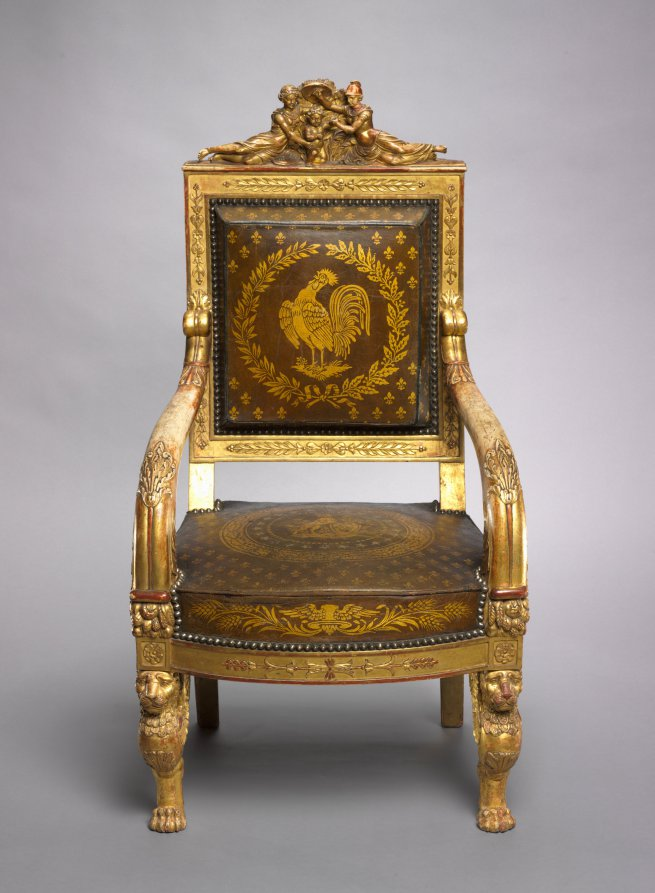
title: Child's Throne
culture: France, Paris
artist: Pierre-Marie Balny le Jeune (French, 1832)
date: 1822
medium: carved and gilded wood, leather upholstery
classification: Furniture and woodwork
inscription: inscribed with stencils inside back rail: BLONDEL TAPISSIER/RUE ST. ANTOINE N 72 1822 inscribed in ink lower edge back rail: 12 JANVIER 18[22?]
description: This chair was made for the young, presumed successor to the French throne who ruled briefly as Henri V in 1830, the last of the direct Bourbon line. He is depicted at the center of the top rail protected by female figures representing France and Minerva, the Roman goddess of wisdom. Fleurs-de-lis and the Gallic rooster, symbols of French royalty and the French people, decorate the upholstery.